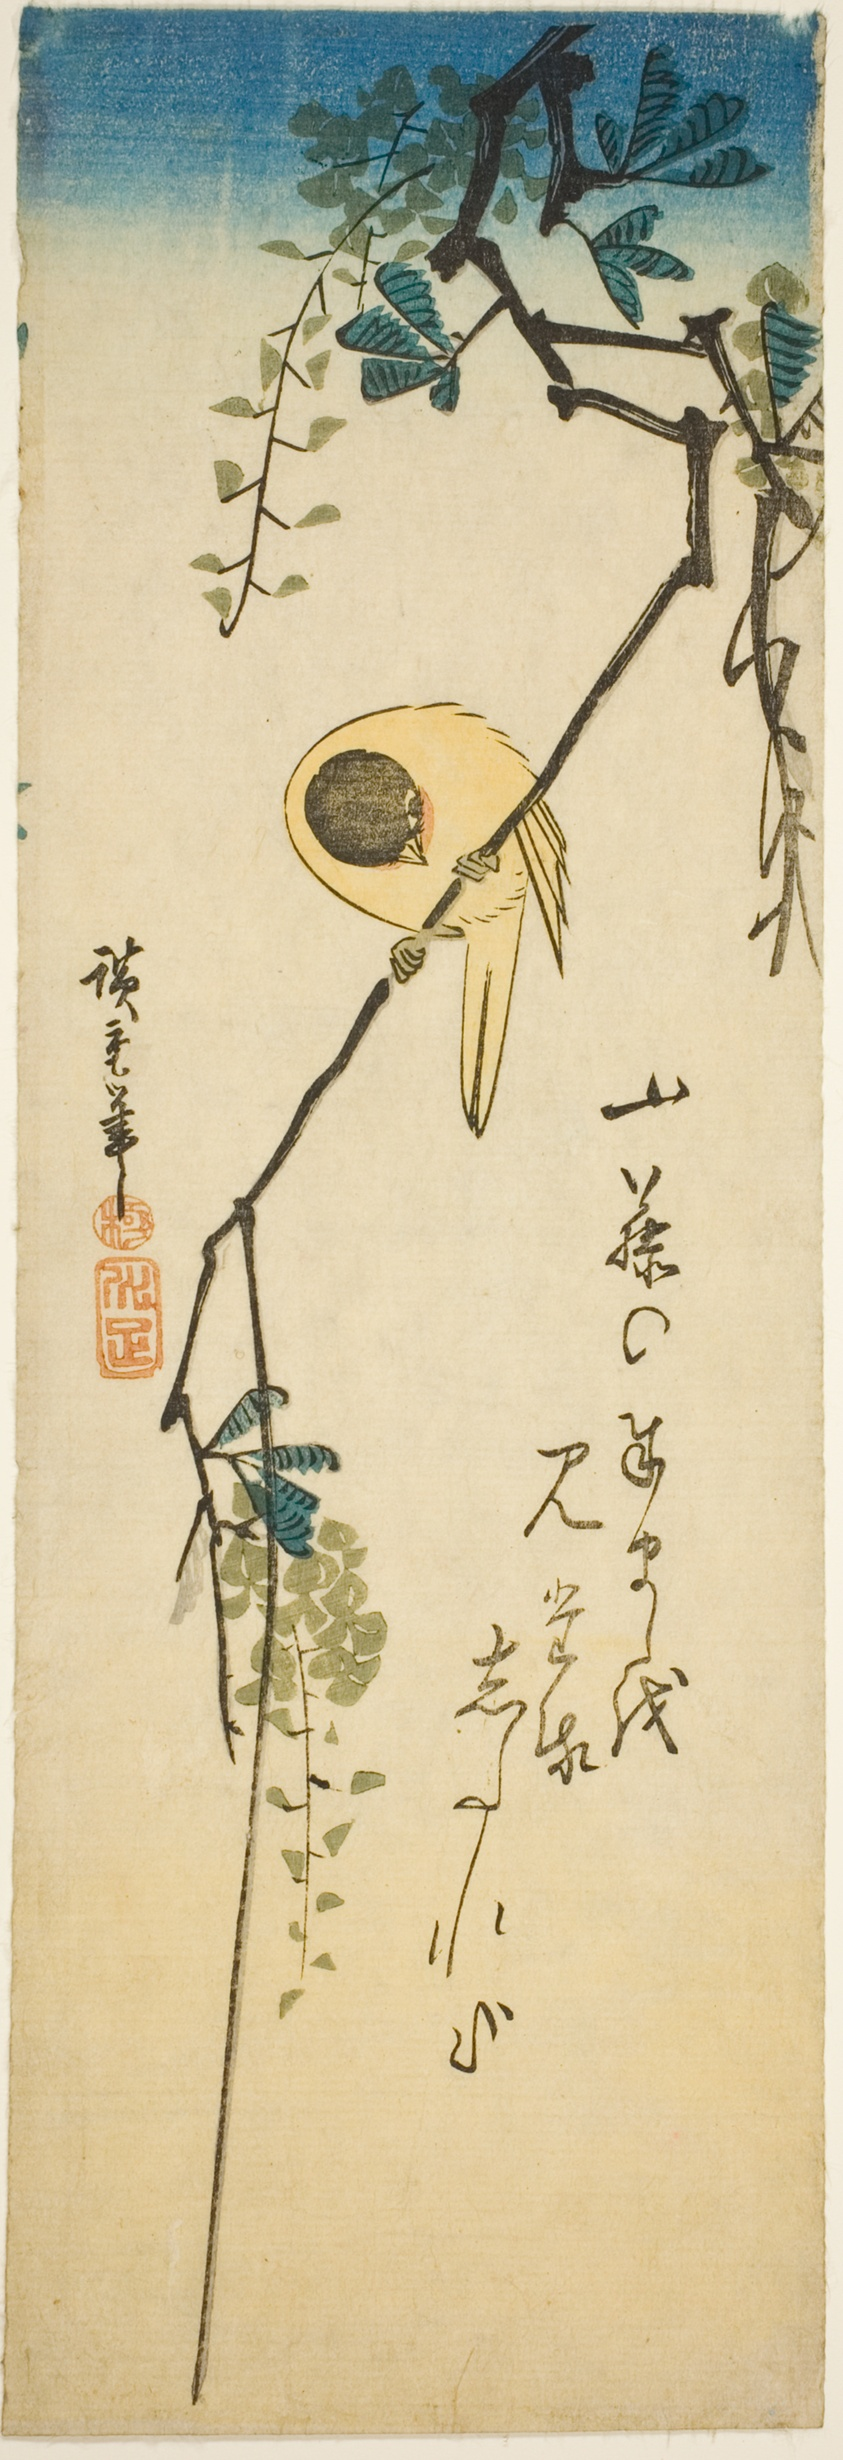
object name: Print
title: Bird on silky wisteria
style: Japanese (culture or style)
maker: Utagawa Hiroshige 歌川 広重; Japanese, 1797-1858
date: 1830s–1840s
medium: Color woodblock print; chutanzaku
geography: Japan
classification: woodblock print; print; asian art